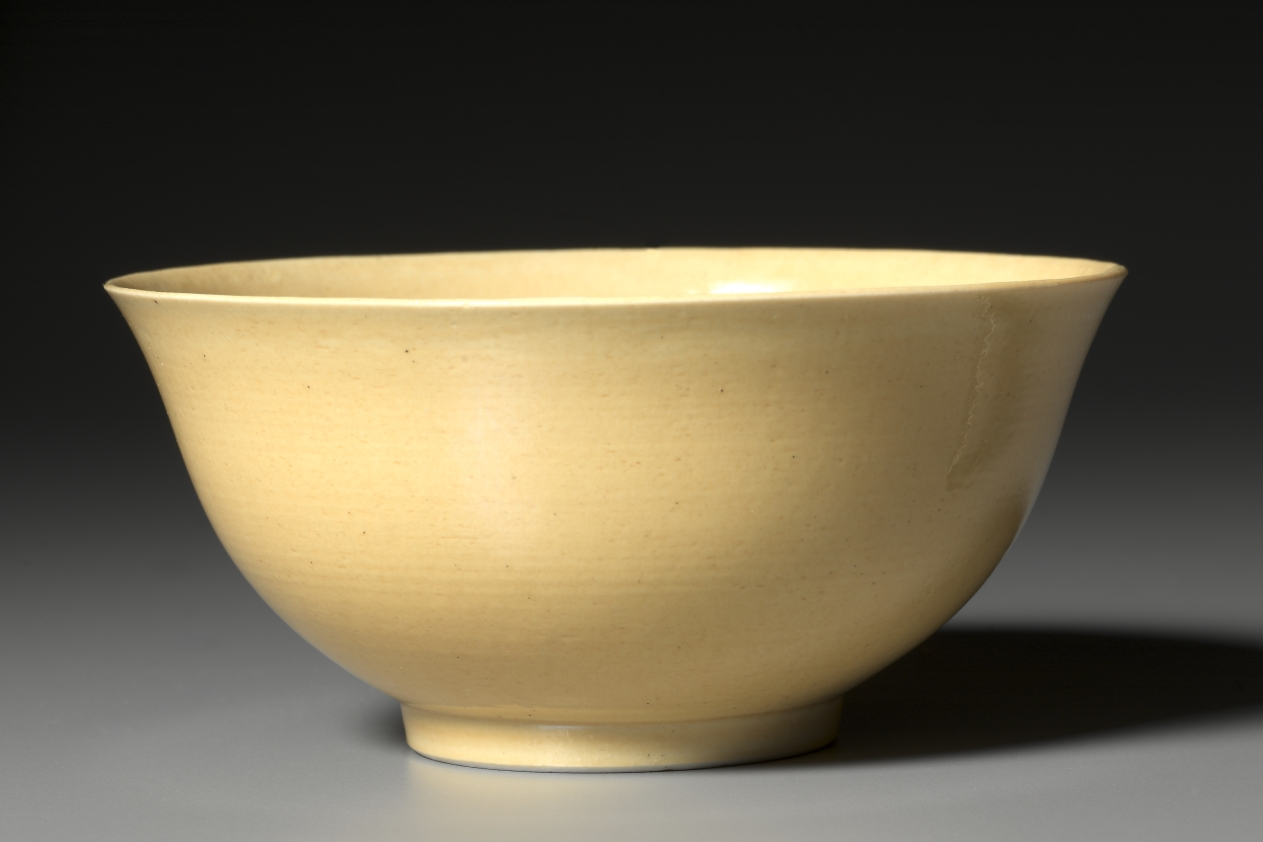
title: Bowl with Yellow Glaze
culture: China, Qing dynasty (1644-1911), Daoguang mark and reign (1821-50)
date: 1821–50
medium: glazed porcelain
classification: Ceramic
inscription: 大清道光年制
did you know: This monochromatic yellow dish was made for the imperial household.